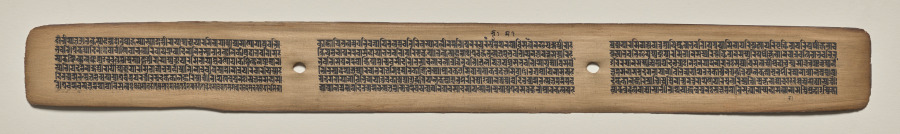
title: Text, Folio 101 (recto), from a Manuscript of the Perfection of Wisdom in Eight Thousand Lines (Ashtasahasrika Prajnaparamita-sutra)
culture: Eastern India, Bihar, Vikramashila Monastery. Painting: Nepal, Kathmandu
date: Sunday, September 14, 1119 (year 239 of the Newar Samvat in the month of Ashvina)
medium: gum tempera and ink on palm leaves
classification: Painting